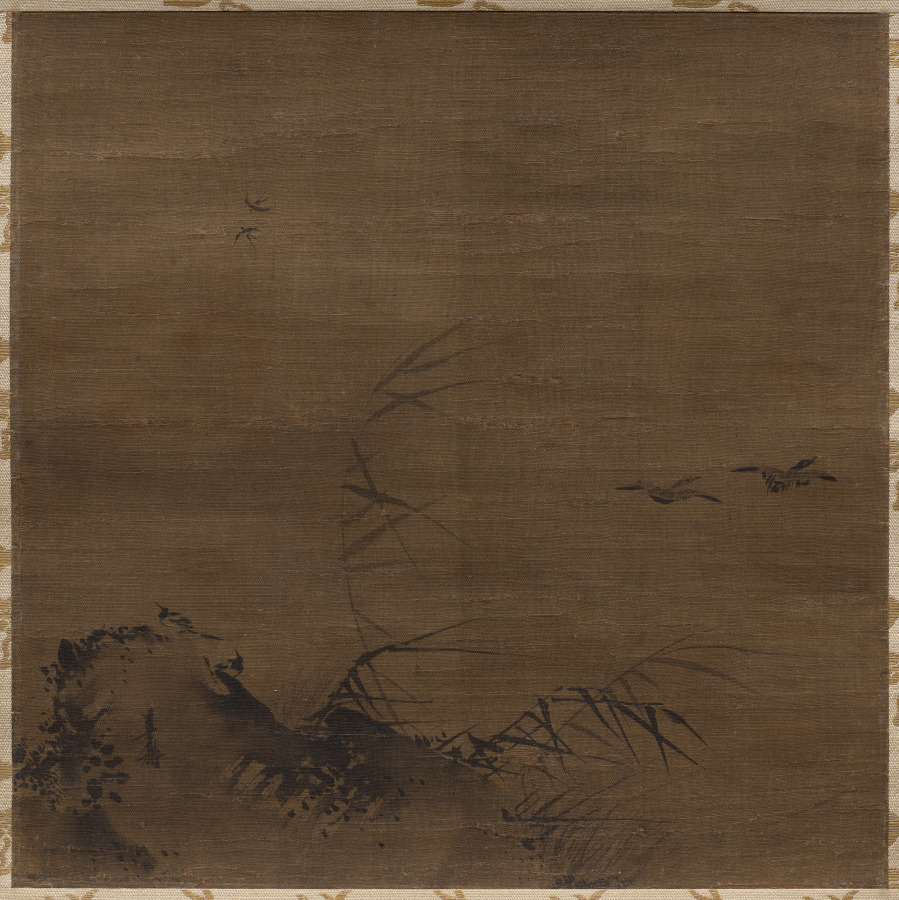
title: Waterfowl and Reeds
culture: China, Southern Song dynasty (1127-1279)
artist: attributed to Liang Kai (Chinese, mid-1100s–early 1200s)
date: early 1200s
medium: Hanging scroll; ink on silk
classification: Painting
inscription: Artist's signature on rock at left.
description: This album leaf now mounted as a hanging scroll is attributed to the 13th-century artist Liang Kai, who served for a time in the Southern Song court as a court painter. In recognition of Liang’s outstanding talent, Emperor Ningzong (reigned 1195–1224) granted him the “Gold Belt,” the highest honor reserved for court painters. The artist, however, left his prestigious position in pursuit of the simple life in Buddhist monasteries. The so-called one-corner composition (leaving empty space on one side as the artist did here) was popular in both the imperial court and Buddhist monasteries. This distinctive composition allowed the artist to render a sense of space. Liang Kai’s abbreviated style and expressive monochromatic brushwork were often understood to embody ideals of Chan (Zen) Buddhism, and were continued by later Buddhist painters.